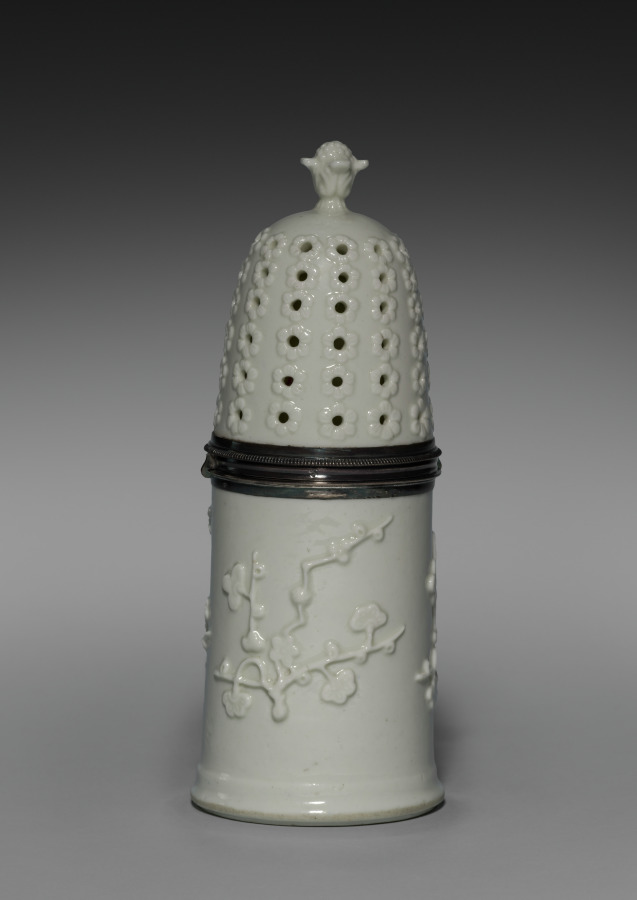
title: Caster (Saupoudreuse)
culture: France, Saint Cloud, 18th century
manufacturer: Saint Cloud Porcelain Factory (French)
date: c. 1732–38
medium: soft-paste porcelain, silver mount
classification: Ceramic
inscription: [Discharge mark of Hubert Louvet, 1732-1738 (Dog's head in profile), on both sections of silver mount]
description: This cylindrical caster with a removable pierced cover may have held sugar. It likely derives its form from silver casters manufactured pre-1700. Its all-white, molded, prunus branch decorations are characteristic of blanc de chine, the term used in France to reference the highly prized porcelain produced in the southeastern Fujian province of Dehua, China, known for its pure color and high degree of translucence.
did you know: Prunus branches, which refer to flowering trees and shrubs including plums, cherries, peaches, nectarines, apricots, and almonds, were a common motif in Chinese porcelain.